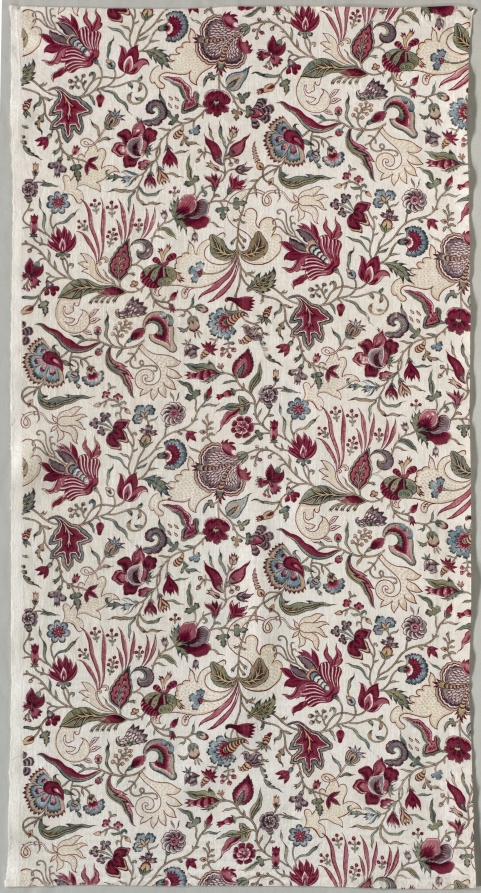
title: Fragment of a Quilted Skirt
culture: England, late 18th century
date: c. 1785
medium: woodblock print on cotton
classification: Textile